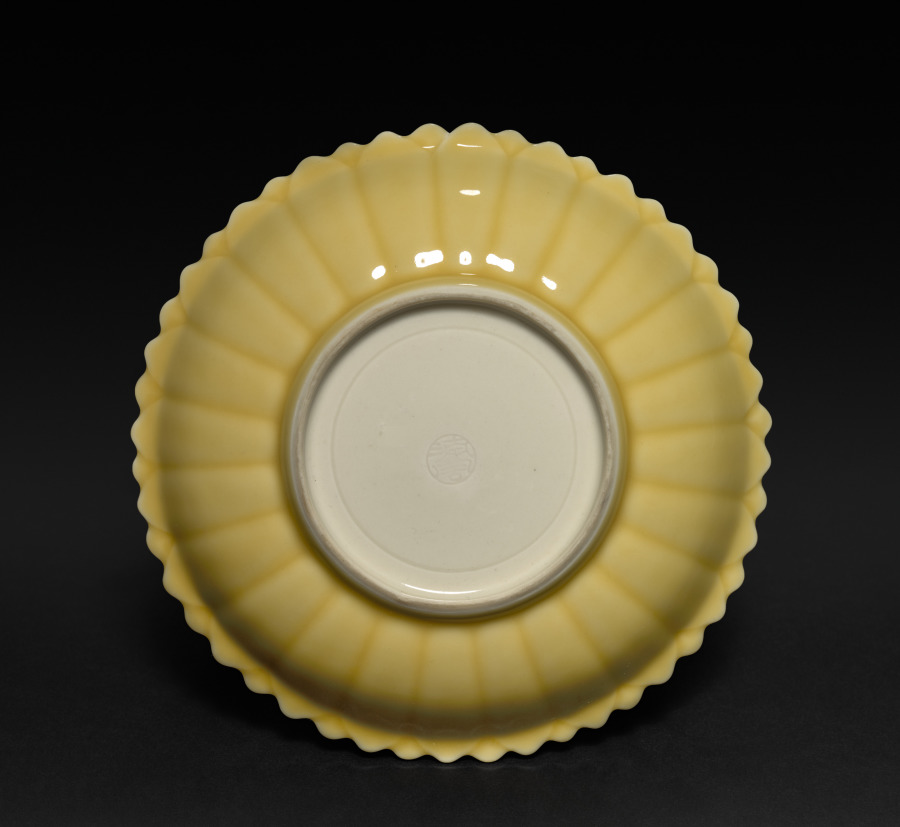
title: Chrysanthemum-Shaped Dish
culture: Japan, Taishō period (1912–26)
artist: Seifū Yohei IV (Japanese, 1872–1951)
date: 1914–46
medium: Porcelain with yellow glaze and molded decoration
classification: Ceramic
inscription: 清風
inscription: 清風造 【印】 清風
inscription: 【印】 清風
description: Like his father, Yohei IV also produced works with red or yellow monochrome glazes. His yellow-glazed works include this sweets bowl molded into the shape of a chrysanthemum, a set of five drinking cups CMA 2022.217, and a pair of sake pourers CMA 2022.216.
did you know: Seifū Yohei IV won a gold medal at the 1915 Panama-Pacific International Exposition in San Francisco for his ceramics.